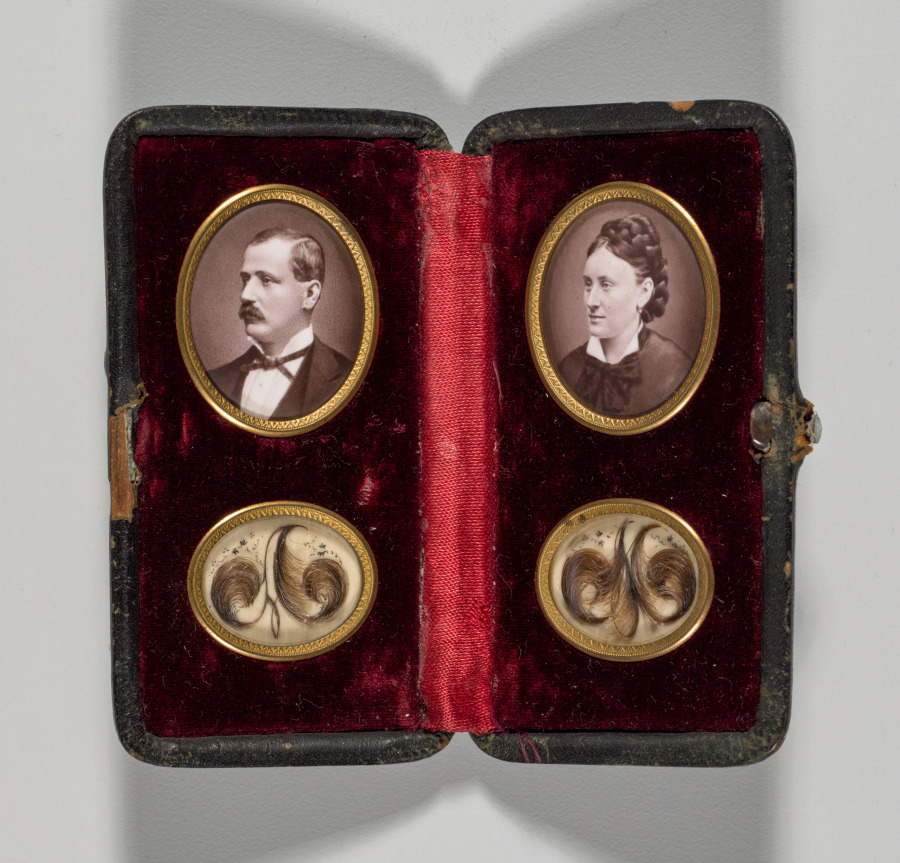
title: Untitled (Case with portraits of a man and woman and hair ornaments)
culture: 19th century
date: c. 1870s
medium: Photographs: photographs on enamel, framed in copper alloy metal frames; hair lockets: hair with pen and black and ink on cream-colored backing; case: leather with metal push-clasp and velvet-lined interior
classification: Photograph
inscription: No visible inscriptions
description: The photographs of this man and woman, presumably husband and wife, are juxtaposed with clippings of their hair arranged to form their initials, A and M. In the late 1800s, photographic portraits and hair clippings combined in jewelry or frames served as mementos or memorials for loved ones. For permanence, the portraits here were vitrified on enamel, a process now used primarily for funerary monuments.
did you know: "Hairwork," produced in commercial workshops and as a popular craft during the Victorian era, was used to celebrate the living and commemorate the dead.